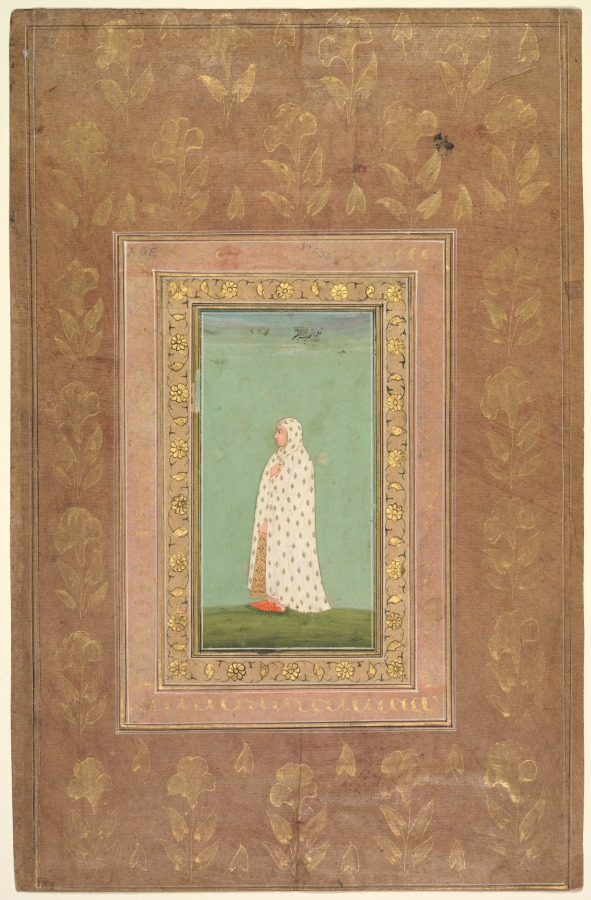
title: Portrait of a Woman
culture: Northwestern India, Rajasthan, Rajput Kingdom of Bikaner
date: c 1675–1700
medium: Gum tempera, ink, and gold on paper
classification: Painting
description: The royal court at Bikaner included Muslim women. This royal woman wears a white cloak covered with a repeating gilded leaf pattern and a screen sewn in at the forehead. When the cloak is pulled over her face for added modesty, she looks out through the screen.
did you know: She stands on a cluster of leafy vegetation.